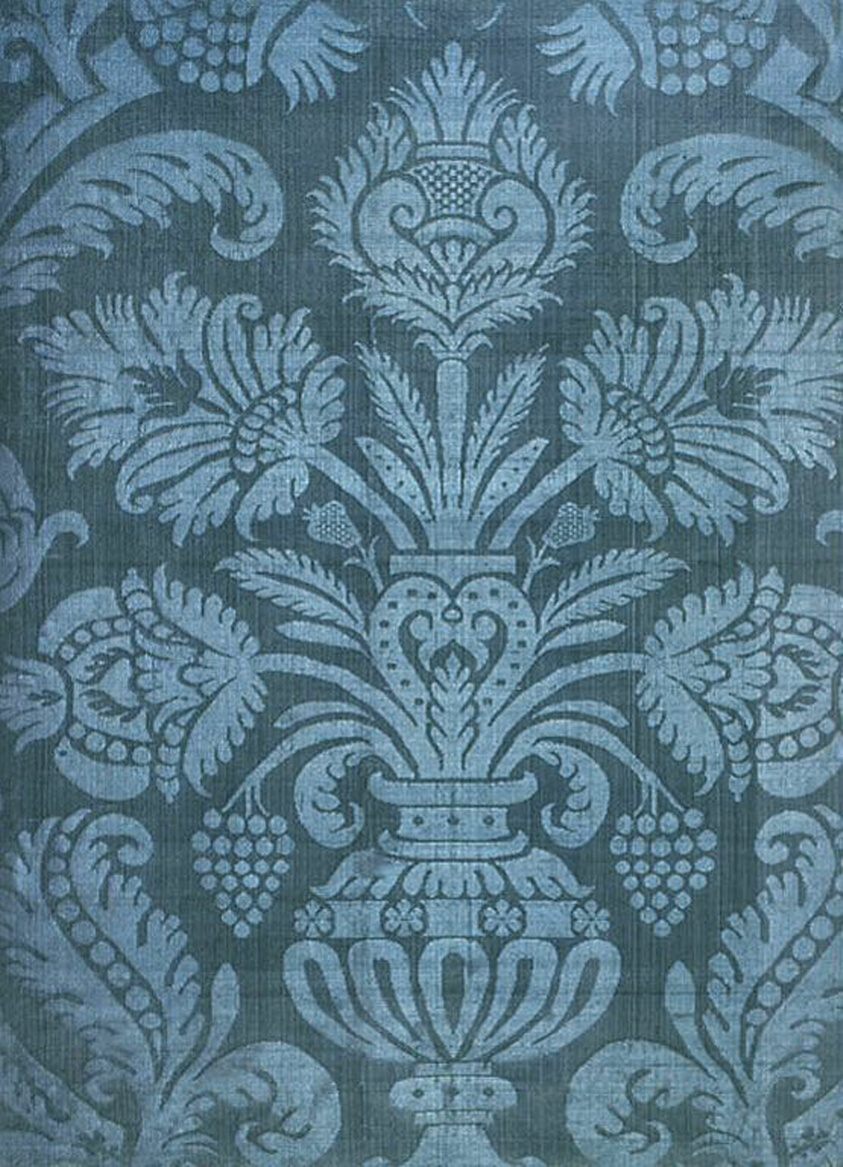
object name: Textile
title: Fragment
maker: Italy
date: 1601/25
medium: Silk, 4:1 satin damask weave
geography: Italy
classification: textile; weaving